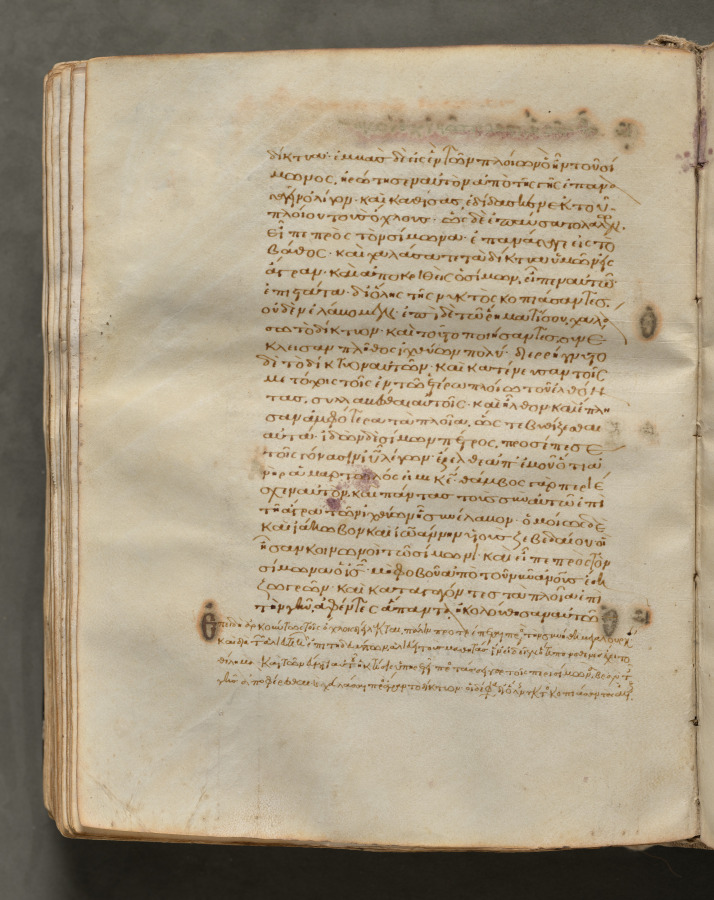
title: Text, folio 222 (verso), from a Gospel Book with Commentaries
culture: Byzantium, Constantinople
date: c. 1000–1100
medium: ink, tempera, and gold on vellum; leather binding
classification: Bound Volume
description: Each of the four gospels in this book opens on a page with brilliantly illuminated borders depicting the author of the text as well as birds-principally peacocks, symbols of the immortality of the soul-and fountains, representing the fountain of life and the salvation of the soul. This volume consists of 428 leaves with texts in Greek. Its level of sophistication suggests that it was probably written and decorated in a monastery in Constantinople.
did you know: Gospel Books were carried in procession through Byzantine churches.